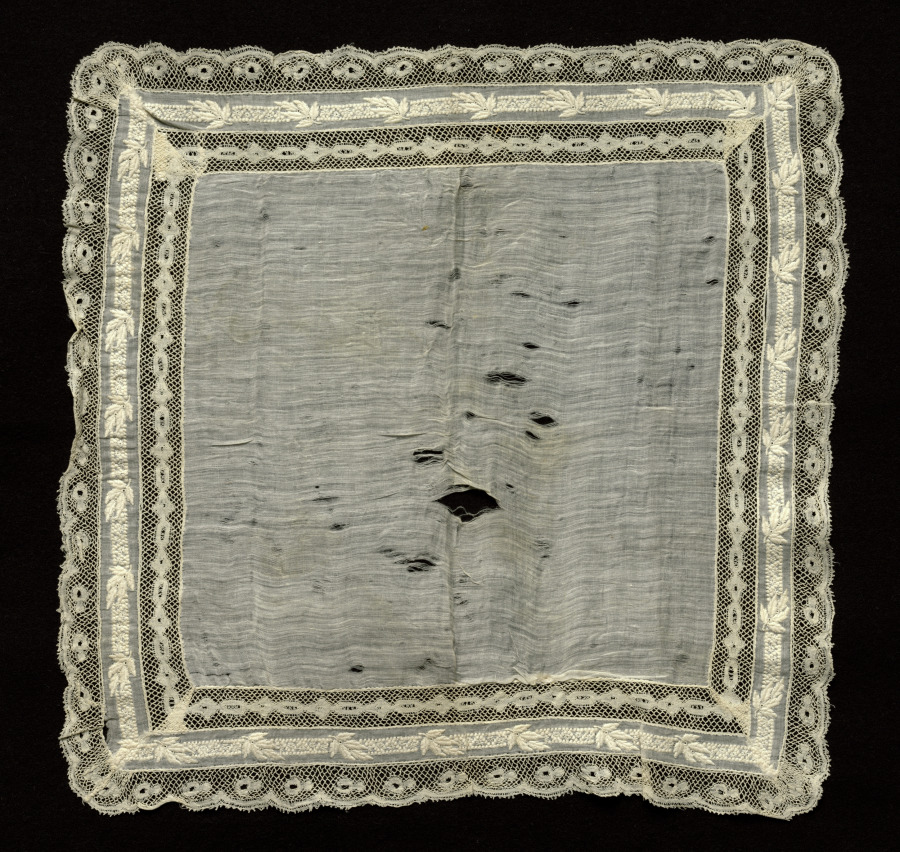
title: Lace Handkerchief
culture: France, Valenciennes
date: 1880–99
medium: Plain weave linen center: bobbin lace (Valenciennes) insertion and edging, and embroidery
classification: Lace